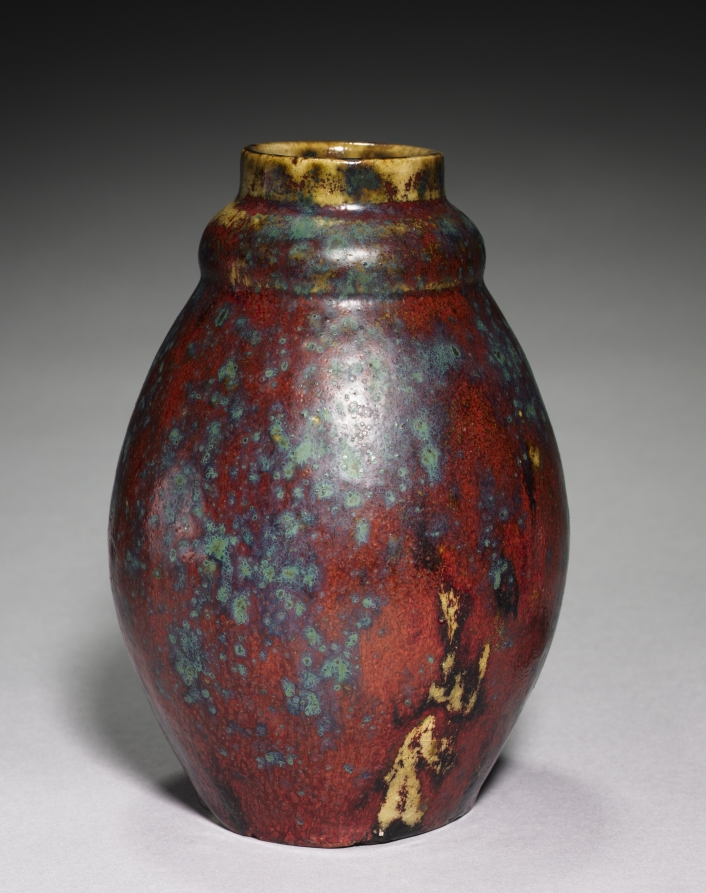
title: Vase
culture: America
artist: Pierre Adrien Dalpayrat (French, 1844–1910)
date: c.1900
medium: stoneware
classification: Ceramic